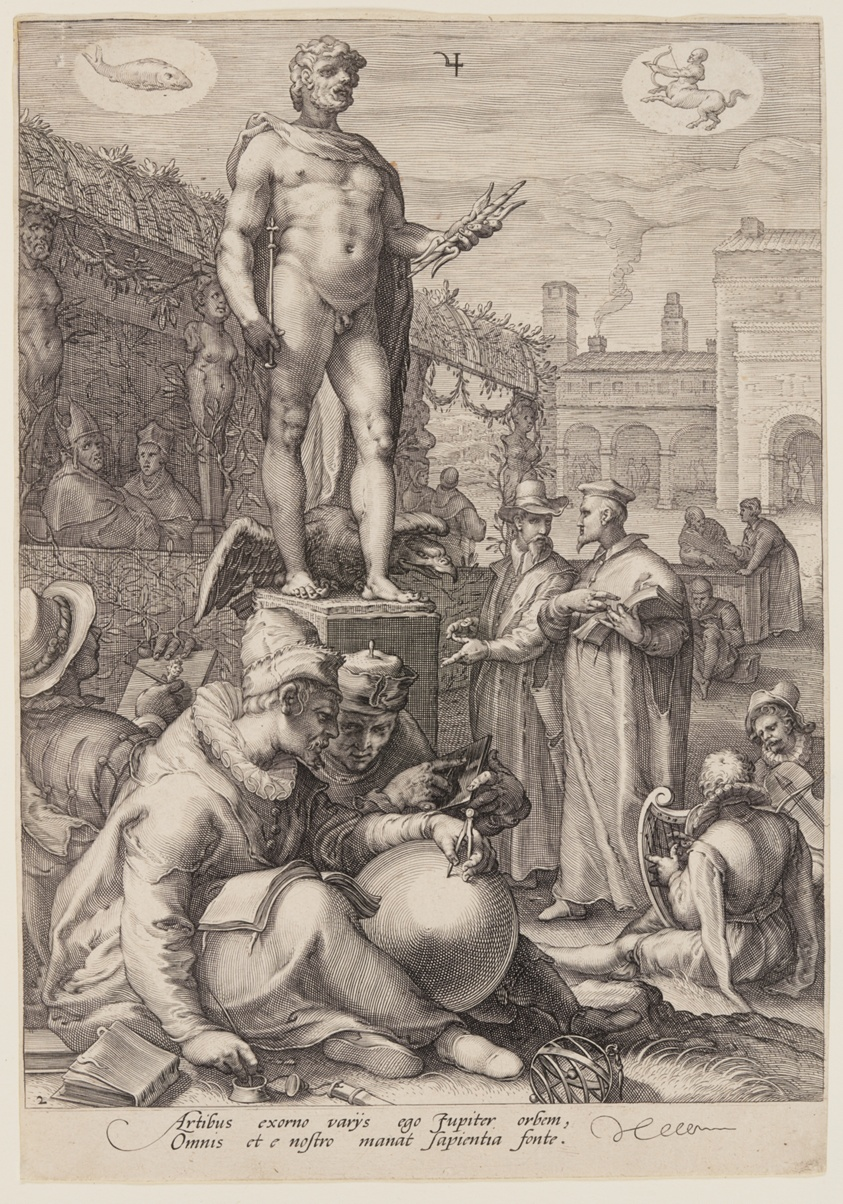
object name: Print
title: Jupiter Presiding over the Liberal Arts, from Seven Planetary Gods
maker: Jan Saenredam (Dutch, 1565–1607); after Hendrick Goltzius (Dutch, 1558–1617)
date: 1596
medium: Engraving on ivory laid paper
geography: Netherlands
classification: engraving; paper; print; prints and drawing